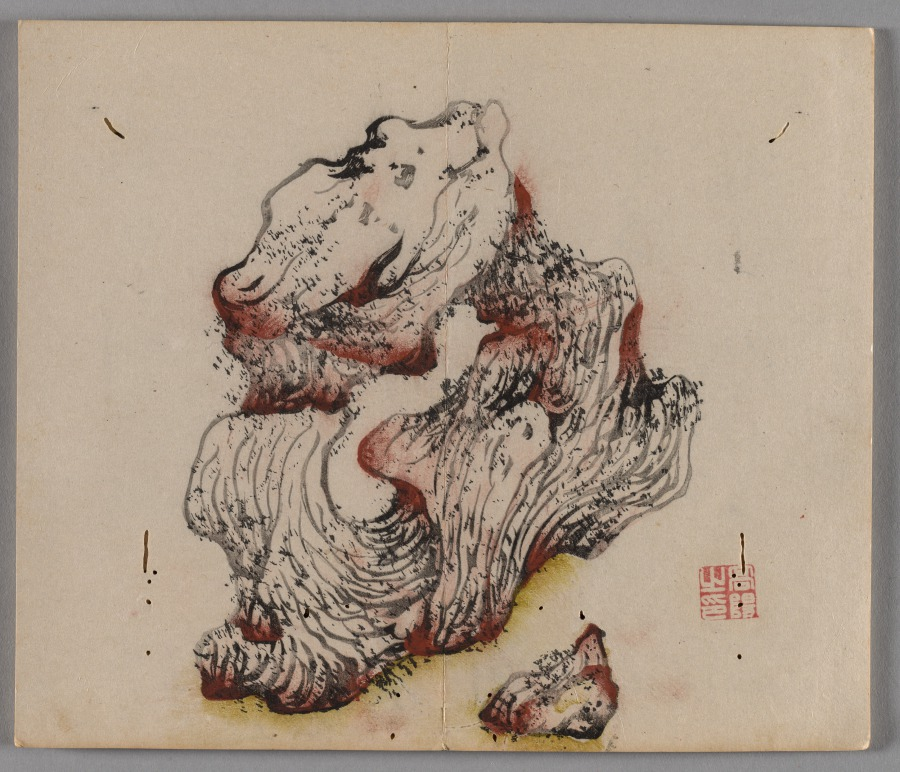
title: Ten Bamboo Studio Painting and Calligraphy Handbook (Shizhuzhai shuhua pu): Rocks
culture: China, Qing dynasty (1644-1911)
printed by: Hu Zhengyan (Chinese, c. 1584–1674)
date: 1633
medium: Woodblock-printed book; ink and colors on paper; first edition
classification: Print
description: Color printing reached a level of perfection in the early 1600s, as seen in this Ten Bamboo Studio Collection of Calligraphy and Painting and the Mustard Seed Garden Manual of Painting (printed 1679 and 1701). The painterly quality, precision in registering (aligning) the woodblocks, and harmonious colors made them the most successful color print editions in Chinese history. Both editions were printed and compiled in Nanjing, spread nationwide, and had a great impact on the arts in Japan and Korea.